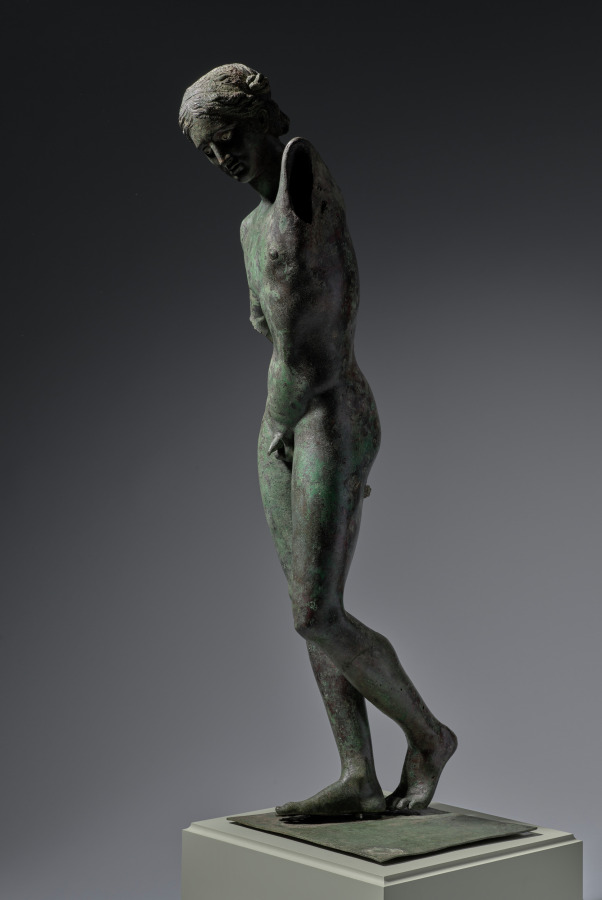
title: The Cleveland Apollo: Apollo Sauroktonos (Lizard-Slayer) or Apollo the Python-Slayer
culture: Greece, Athens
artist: attributed to Praxiteles (Greek, Athenian, c. 400–330 BCE)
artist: or Follower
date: c. 350–200 BCE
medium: bronze, copper, and stone inlay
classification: Sculpture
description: The Cleveland Apollo has been called both Lizard-Slayer (Sauroktonos) and Python-Slayer. The first name comes from the Roman author Pliny the Elder (23–79 CE), who noted in describing bronze works made by the Athenian sculptor Praxiteles (active around 370–330 BCE), “the youthful Apollo [is] known as the Sauroktonos because he is aiming an arrow at a lizard [Greek sauros] which is stealing toward him.” Scholars have long connected this description with artworks showing the young Greek god Apollo in a distinctive pose and hairstyle, standing on his right leg and leaning to his left. In more completely preserved versions, Apollo reaches toward a tree with his left arm and seems to take aim at a lizard. The Cleveland Apollo shows the adolescent god similarly posed and coiffed, making it an important addition to the Apollo Sauroktonos group—the only surviving large-scale bronze sculpture of the type. The young Greek god Apollo, identifiable by his distinctive hairstyle and pose, stands on his right leg and leans to his left, probably toward a now-lost tree. Although now separated, the left forearm and hand survive, together with an unusual lizard-like creature, perhaps drawn from the world of myth. A flat bronze base also remains, though it may be a later adaptation. A tree or other support has been lost, probably smaller than in the marble versions. Given its material and very high artistic quality—note the lifelike hair, fingernails, and inlaid copper lips and nipples—more than one scholar has suggested that the Cleveland Apollo could be the very sculpture seen by Pliny. Some have called the sculpture “Python-Slayer,” seeing the oddly shaped serpentine creature with asymmetrical legs as the mythical Python killed by Apollo in establishing his sanctuary at Delphi. But technical details may explain some of the asymmetry, and no other specific evidence connects it to Delphi. Most scholars would retain the name Sauroktonos (Lizard-Slayer) for the Cleveland Apollo, even as some debate whether it was made by Praxiteles himself or a later follower.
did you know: The Cleveland Apollo is the only surviving large-scale bronze sculpture of its type, Apollo Sauroktonos (the Lizard-Slayer).